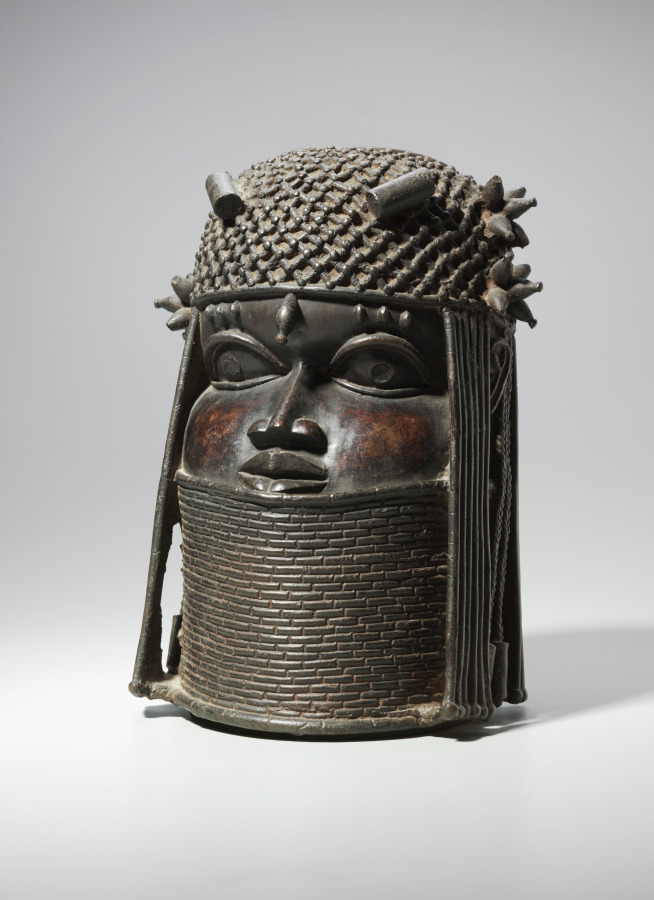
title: Ancestral Commemorative Head (uhunmwun-elao)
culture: Nigeria, Benin Kingdom, Ẹdo peoples, members of the Igun Eronmwon (royal brasscasters) guild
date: possibly mid-1500s or early 1600s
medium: Copper alloy and iron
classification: Sculpture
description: Brass heads are among many objects a new Ọba commissions when dedicating a shrine to their predecessor. This head of an Ọba wears layered necklaces of royal coral beads. Tubular beads adorn both the netted cap and slender braids alongside his temples. While representing an individual, his facial features and calm expression are idealized. The thickly cast head once supported a tusk. Immune to corrosion, brass symbolizes royal permanence. A personal religious object, this head sat on an ancestral altar in the Ọba’s palace. Like many works taken from Benin altars, this contrasts with its present-day public display in an American museum.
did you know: The obas (kings) of the Benin Kingdom still wear coral headpieces and jewelry like this sculpted head depicts.